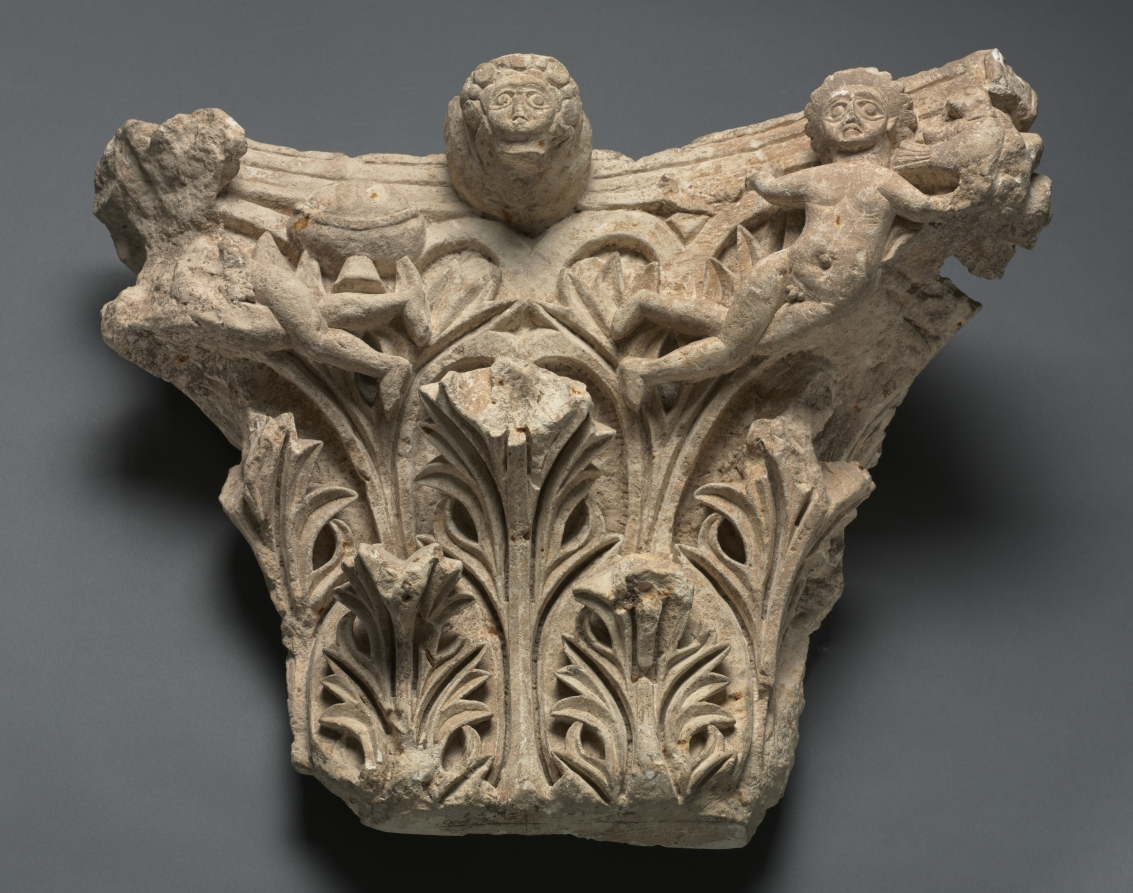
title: Engaged Capital with Human Figures and Foliage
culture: Egypt, Coptic period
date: 300s–400s CE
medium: limestone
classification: Sculpture